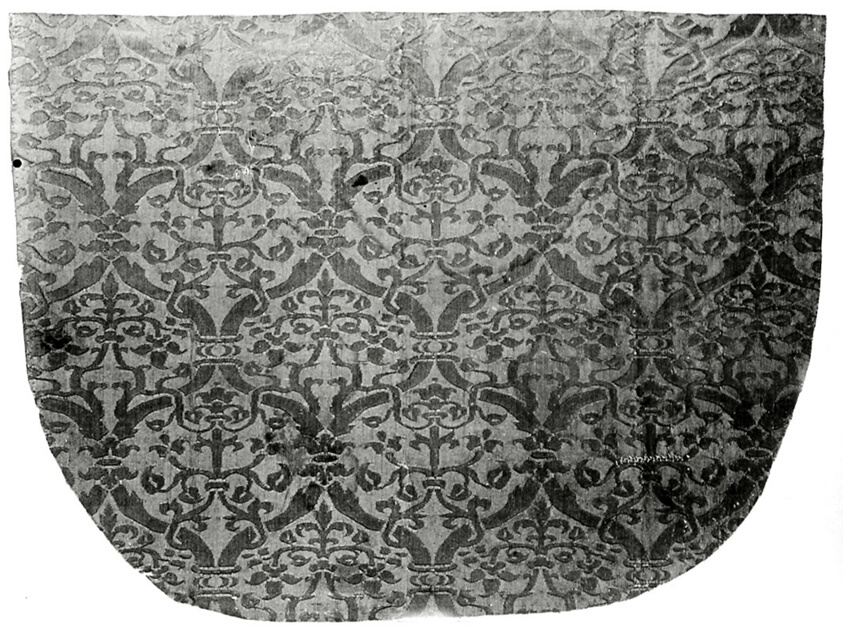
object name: Textile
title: Panel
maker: Italy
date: 16th century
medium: Silk, damask weave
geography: Italy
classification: textile; weaving